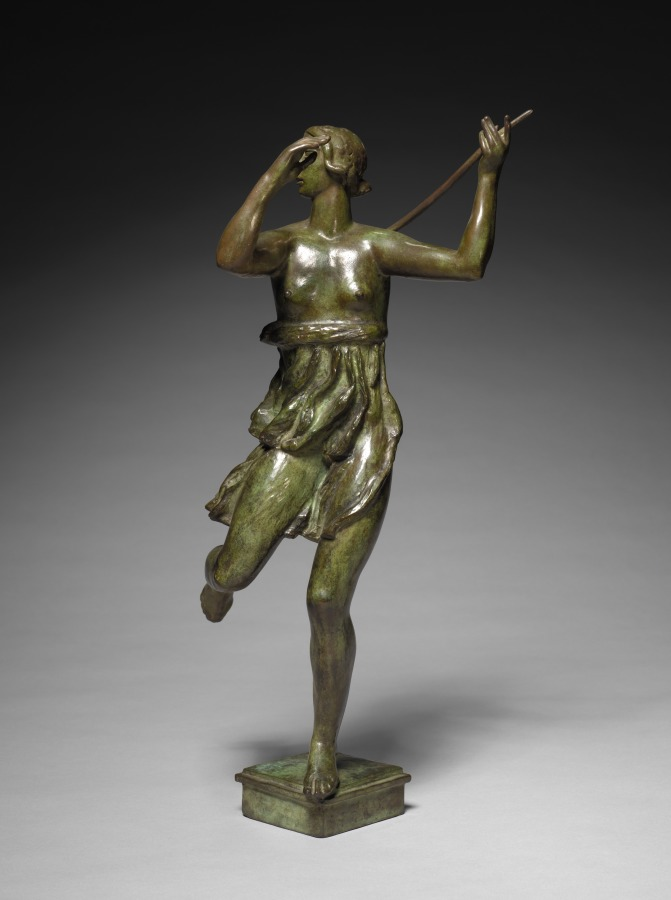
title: Diana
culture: Sweden, 20th century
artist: Carl Milles (Swedish, 1875–1955)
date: 1927–1928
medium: bronze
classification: Sculpture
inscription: Signed on back of base: "Milles"